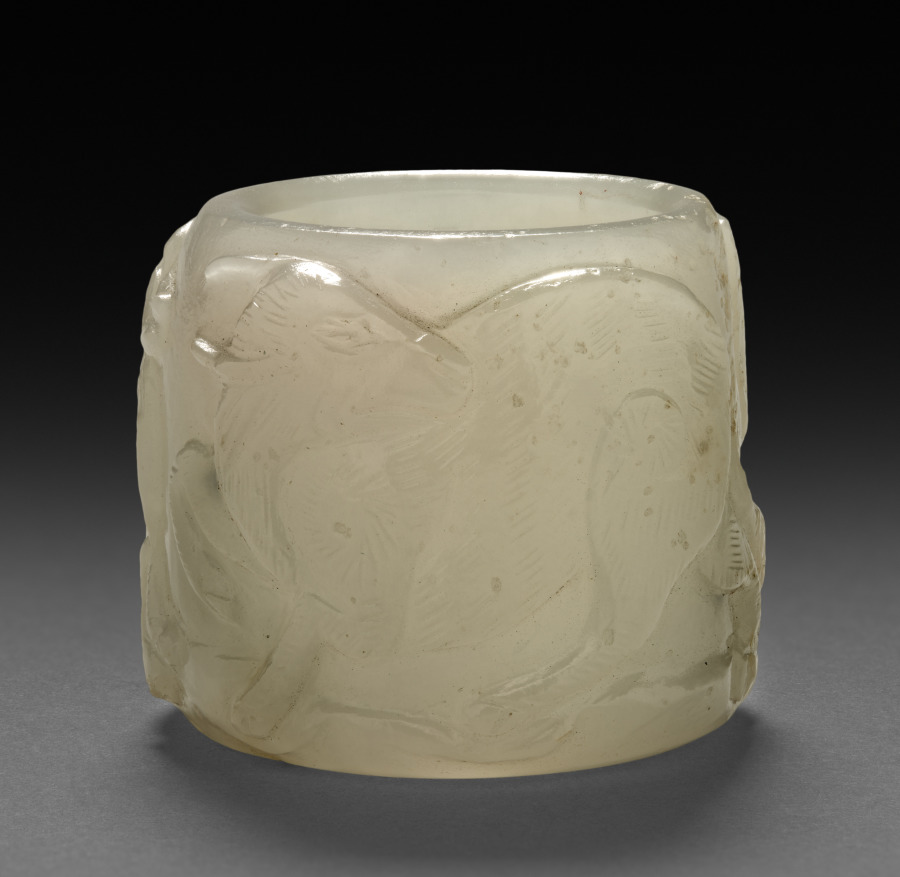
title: Thumb Ring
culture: China, Qing dynasty (1644-1911) or Republican period (1912-49)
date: 1800s–mid-1900s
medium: white jade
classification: Jewelry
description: Jade rings were worn by men on the thumb of the right hand to assist with holding and pulling the string of the archer’s bow. However, thumb rings were also fashionable accessories for civil officials in the late Qing dynasty.